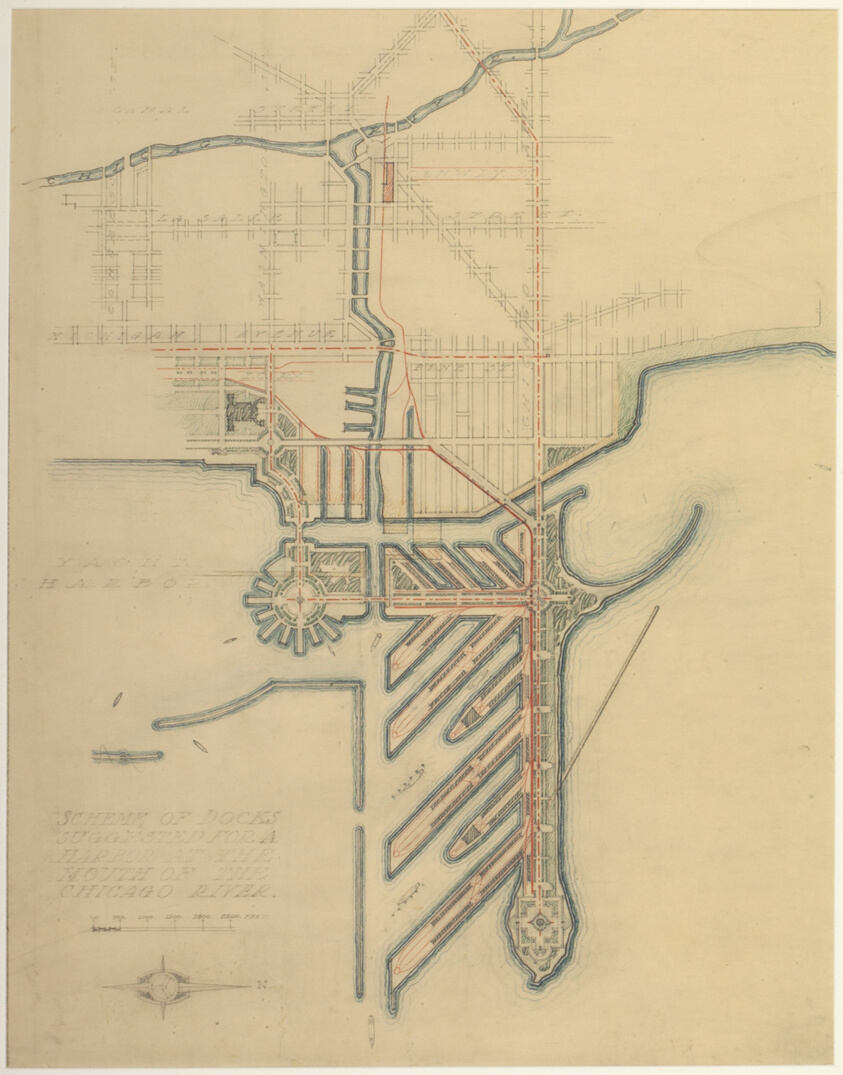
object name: Architectural Drawing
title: Plate 71 from The Plan of Chicago, 1909: Chicago. Sketch Diagram of Docks Suggested at the Mouth of the Chicago River for Package Freight Steamers.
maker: Daniel Hudson Burnham, American, 1846-1912; Edward Herbert Bennett, American, born England, 1874-1954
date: 1909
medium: Graphite and colored pencil on paper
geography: United States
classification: graphite; architectural drawing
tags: architecture